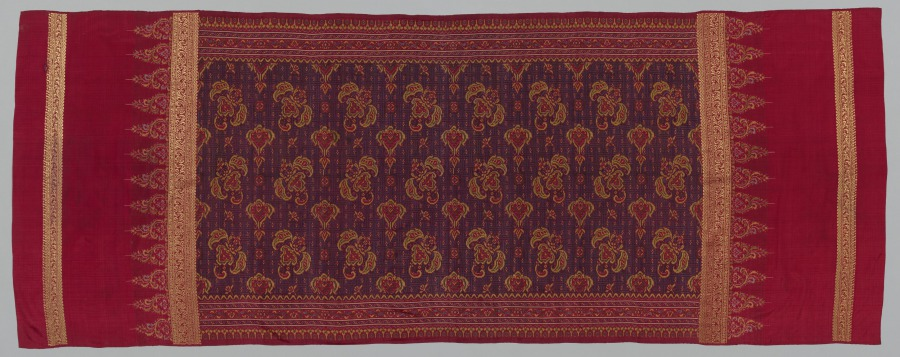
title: Shoulder Cloth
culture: Indonesia, Sumatra, Palembang, 19th century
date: 1800s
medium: weft ikat and gold, tabby weave, brocaded; silk and gold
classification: Textile